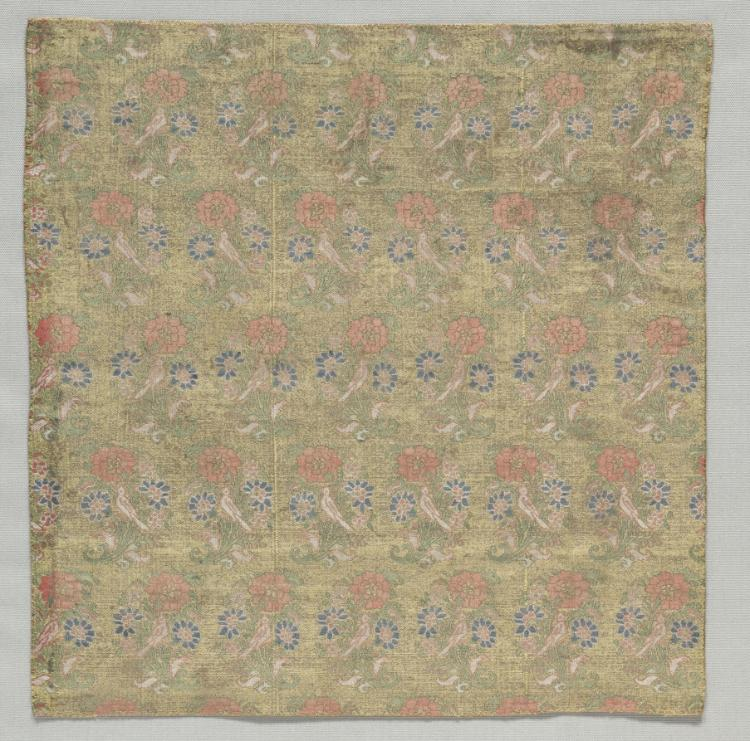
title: Fragment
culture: Iran, 18th century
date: 1700s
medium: brocade; silk and metal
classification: Textile